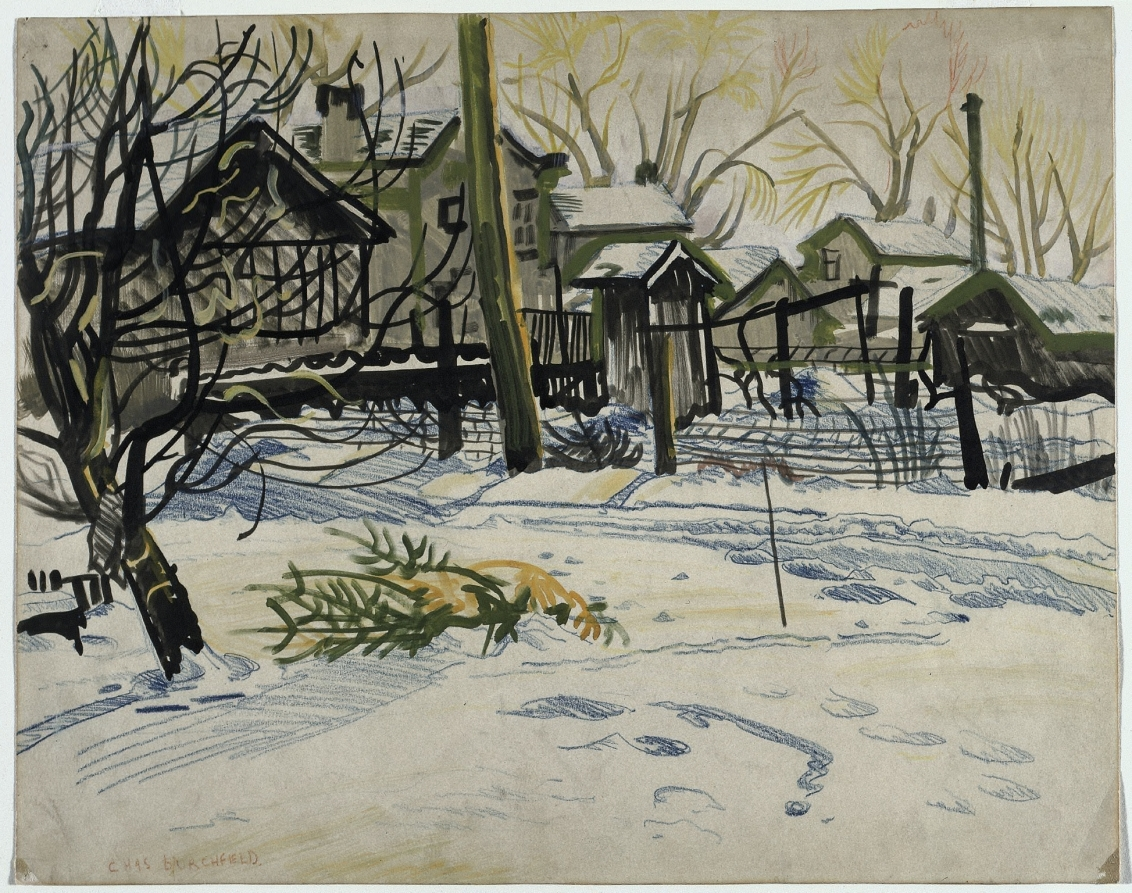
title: Backyards in Winter (Castoff Christmas Tree)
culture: America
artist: Charles Burchfield (American, 1893–1967)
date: January 1917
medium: watercolor, gouache, blue and orange crayons, and black wash on wove paper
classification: Drawing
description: In this drawing, the gray and brown tones of a row of houses are interrupted by the bright green and yellow of a discarded Christmas tree. The work was created in the same year as Church Bells Ringing, where a Christmas tree visible through a window was meant to contrast the work’s foreboding mood. This earlier image similarly suggests Burchfield’s passion for his favorite holiday, which he saw as a symbol of goodness.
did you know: Christmas trees recurred throughout Burchfield's work around this time.